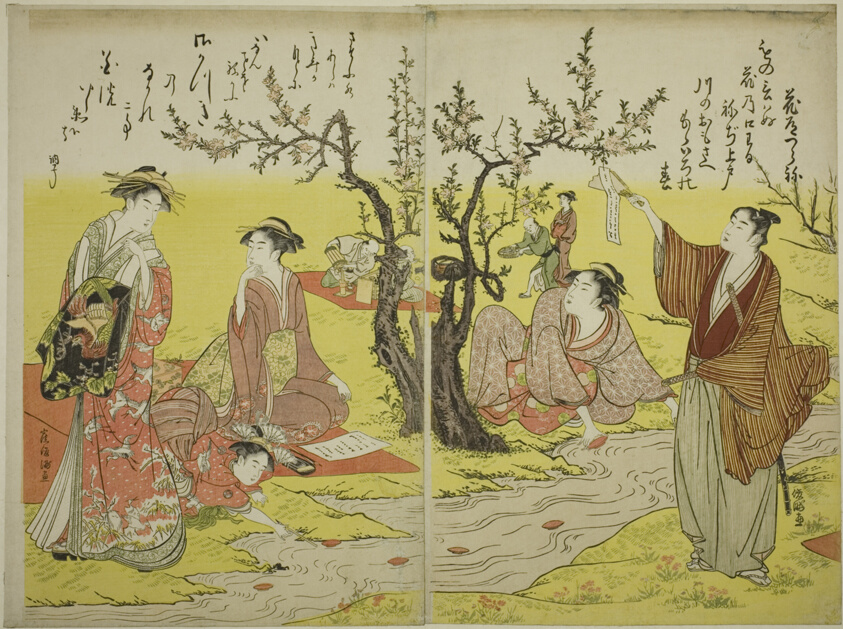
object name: Print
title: A Winding Stream Party (Kyokusui no en)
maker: Kubo Shunman (Japanese, 1757-1820)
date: Edo period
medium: Color woodblock print; nishiki-e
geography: Japan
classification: woodblock print; print; asian art